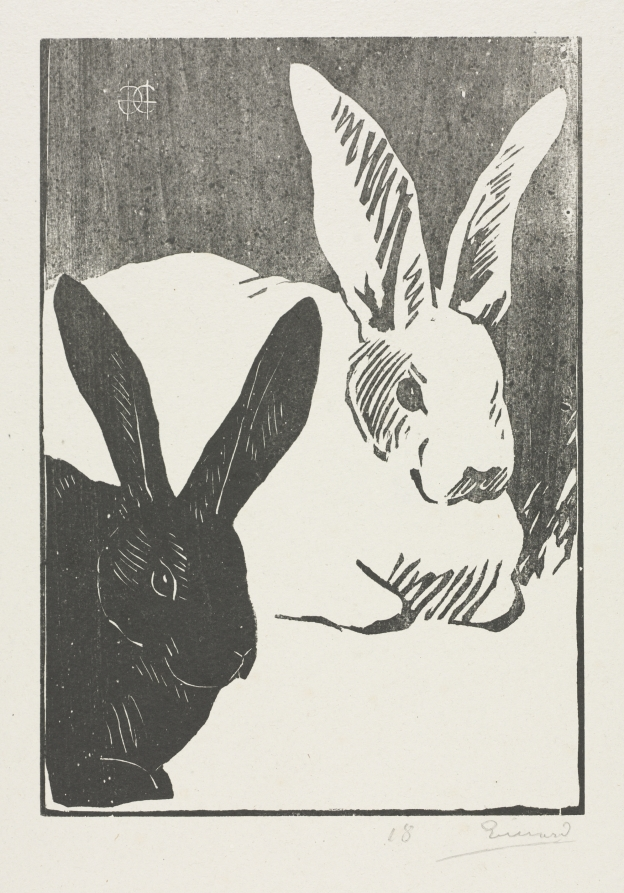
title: The Rabbits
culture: France, 19th century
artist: Henri Charles Guérard (French, 1846–1897)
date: 1893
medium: woodcut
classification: Print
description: Since Guérard was described as the "Japonais de Paris" (Japanese of Paris), it is appropriate that the stylistic source for The Rabbits would be the Japanese artist Katsushika Hokusai (1760-1849), who made many woodcuts of animals.